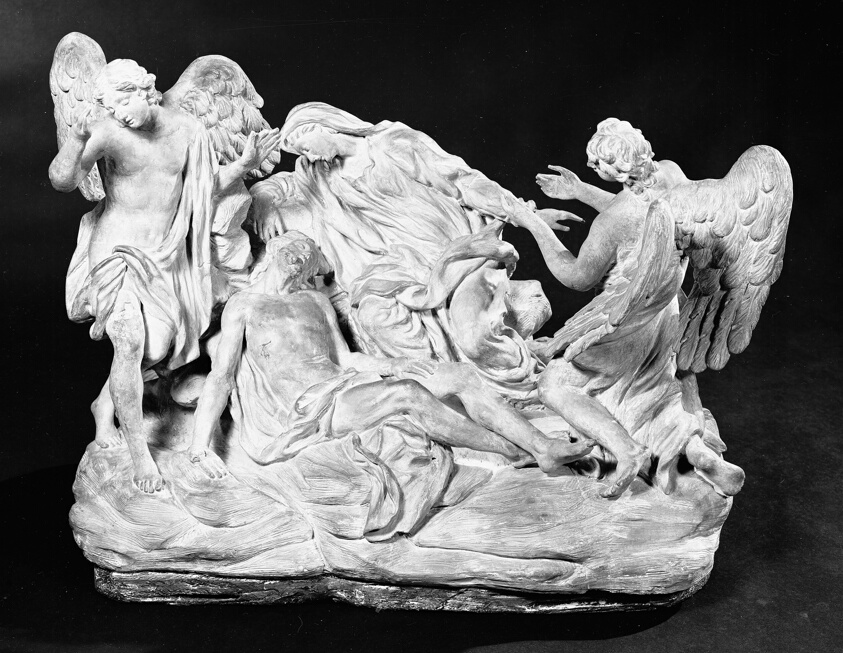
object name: Sculpture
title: Pietà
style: 18th Century, 19th century, nineteenth century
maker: Workshhop of Massimiliano Soldani (Italian, 1658–1740)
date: 1700/1800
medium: Terracotta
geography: Italy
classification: statuette; sculpture; terracotta (sculpture); Italian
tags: religious scenes, angels, Christian subjects, Christianity, death, Jesus, mother, mother and child, religion, religious, religious figures, sons, Virgin Mary